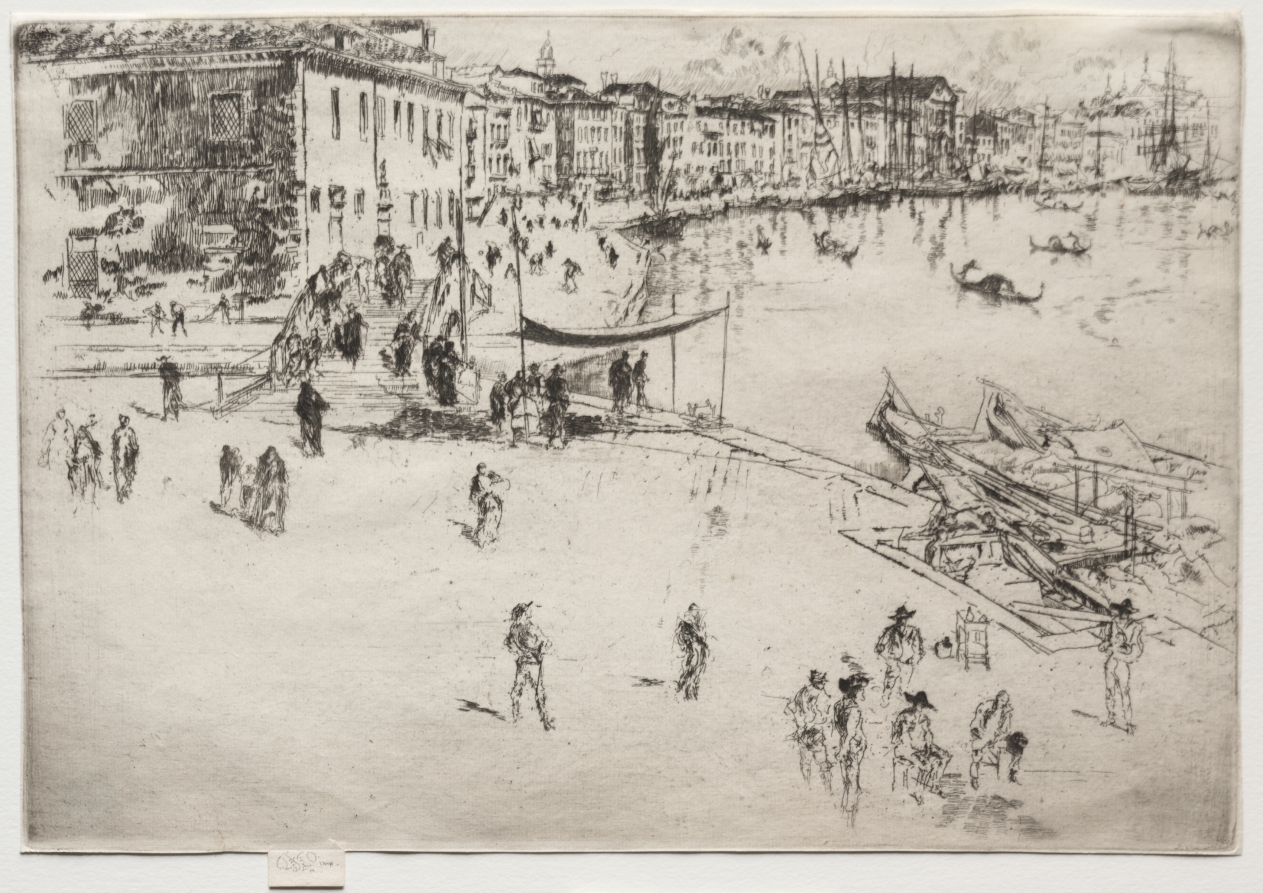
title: The Riva, No. 2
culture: America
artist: James McNeill Whistler (American, 1834–1903)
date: 1886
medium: etching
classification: Print